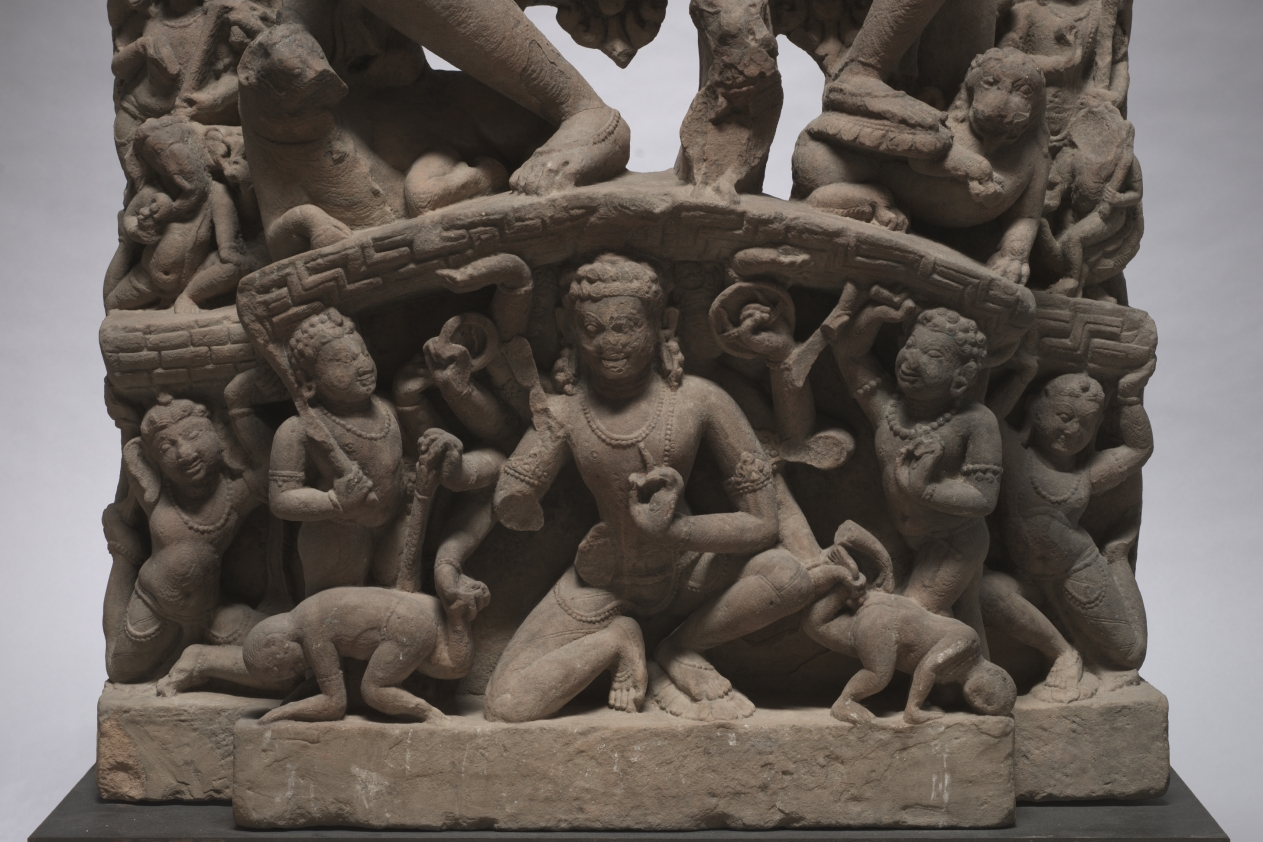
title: Ravana Shaking Mount Kailasa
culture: Central India, Madhya Pradesh, Chandela Dynasty, 8th century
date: 700s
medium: sandstone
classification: Sculpture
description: According to followers of the branch of Hinduism that considers Shiva to be the ultimate, original creator of the universe, he takes on a mythological form and resides in his created world. His home is in the Himalaya Mountains, on Mount Kailasa, where he lives with his wife Parvati. In one episode of Shiva's mythology, he presses down his big toe to quell the ten-armed demon Ravana, who tried to steal Mount Kailasa and take it away to his island. As Ravana was trying to shake the mountain loose, Parvati turned and clung to Shiva in fear— the moment depicted in this magnificent sculpture, which once formed part of a temple exterior. It is thought that Shiva created the world for the sake of his own enjoyment, his lila or divine play, and emanated himself into all the beings of creation: gods and demons, humans and animals. He shrouded their awareness of the reality that they were in essence the god Shiva himself, so that they would perform the actions of his cosmic drama.